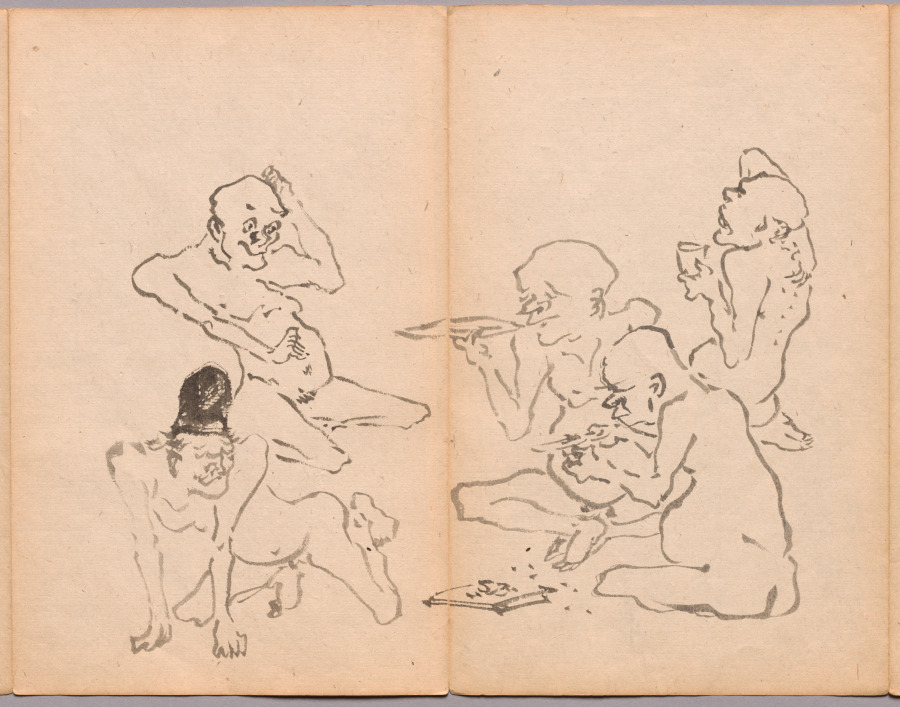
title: Drinking Party from Sketch Album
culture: Japan, Edo period (1615–1868) to Meiji period (1868–1912)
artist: Kawanabe Kyōsai (Japanese, 1831–1889)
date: mid- to late 1800s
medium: Accordion-style book of 26 double-leaves; ink and color on paper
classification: Bound Volume